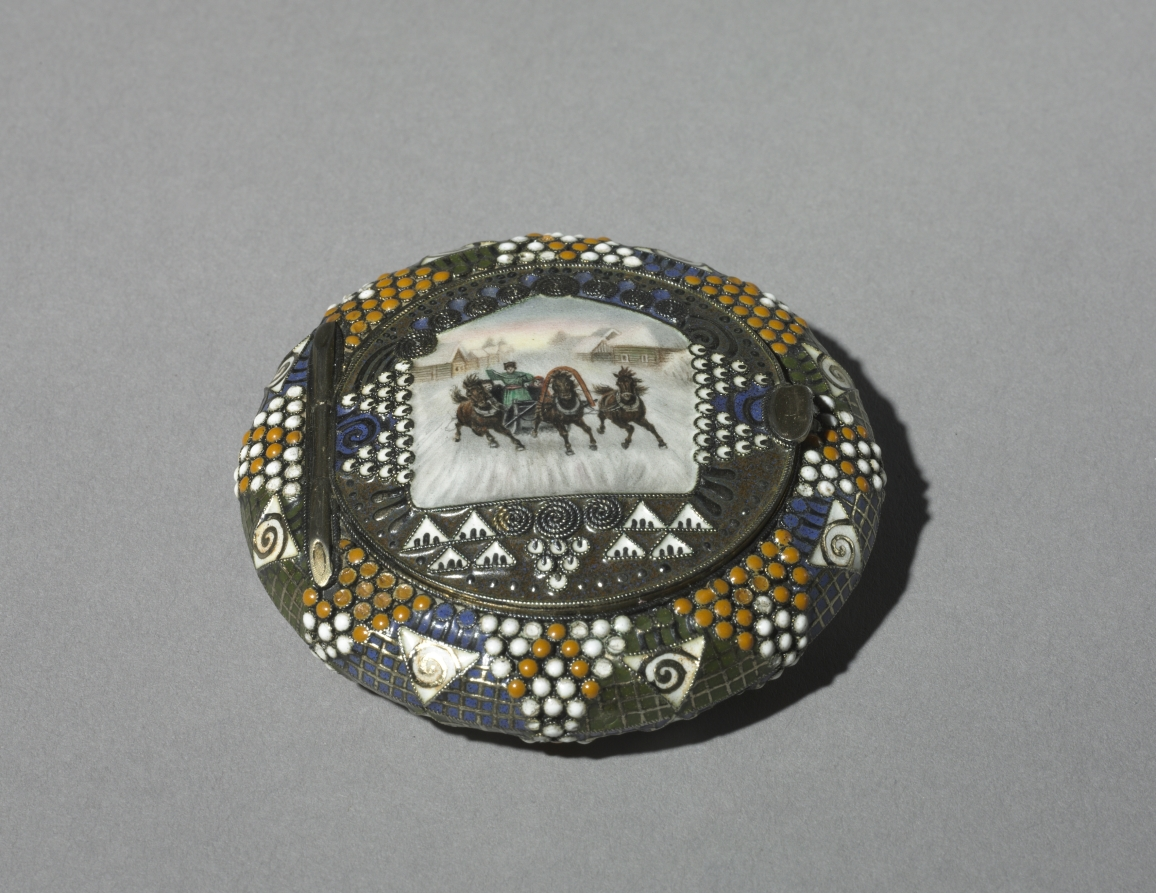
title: Pill or Snuff Box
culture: Russia, St. Petersburg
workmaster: attributed to Feodor Ivanovich Rückert (Russian, 1840–1917)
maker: House of Fabergé (Russian, 1842–1918)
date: 1906–16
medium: silver gilt and enamel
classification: Miscellaneous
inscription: Marks: Kokoshnik (?), tester's initials [assay mark of Moscow, 1908-26]; 88; C. Fabergé (in Cyrillic); double-headed eagle [imperial warrant]; scratched 25477.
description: Fabergé’s craftsmen in Moscow became known for their work in the pan-Slavic or neo-Russian taste, hearkening back to 17th-century styles of Russian folk decoration. This little box for pills, snuff, or cosmetic patches follows on in this style with its scene of a romantic ride in the quintessential mode of Russian transportation, a horse-drawn sleigh or troika.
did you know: Around 1900, ladies often carried little boxes for medicines, a pinch of snuff, or cosmetic patches for the face.